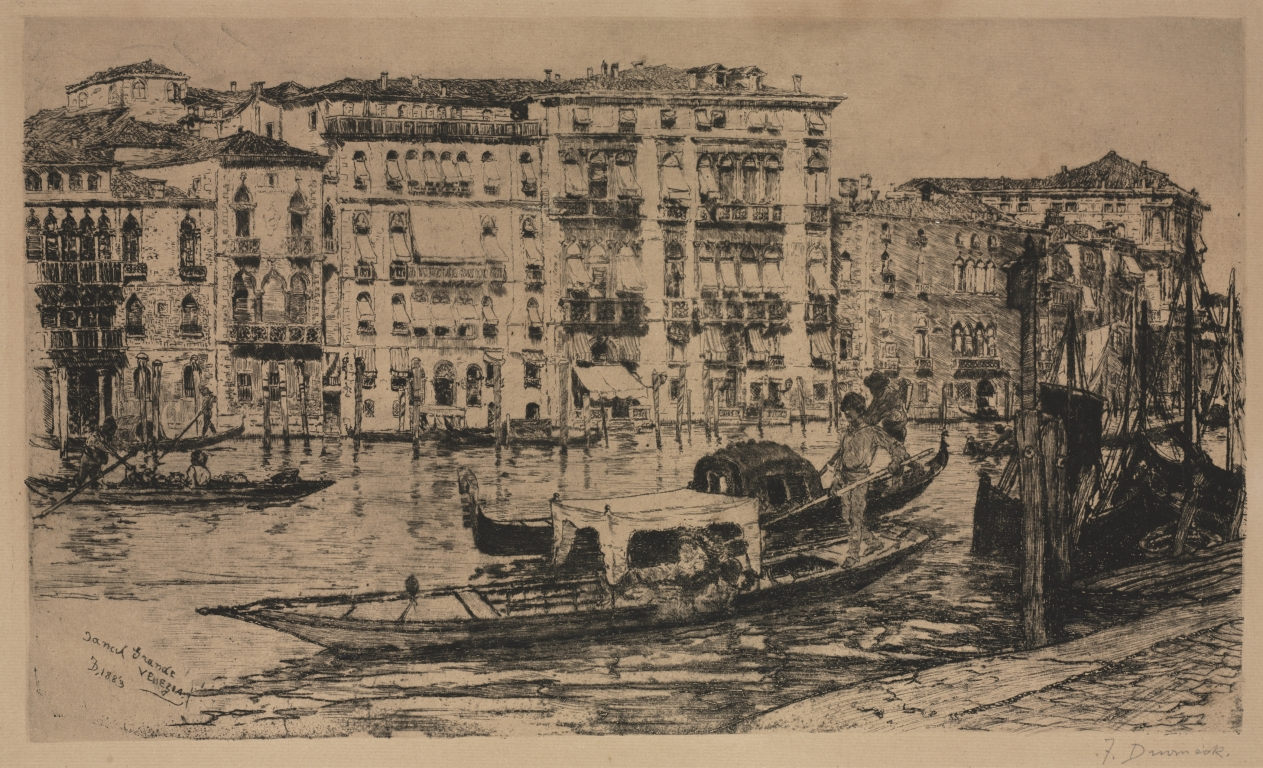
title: Grand Canal, Venice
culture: America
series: Desdemona's House, Grand Canal, Venice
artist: Frank Duveneck (American, 1848–1919)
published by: Frederick Keppel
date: 1889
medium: etching with pencil additions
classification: Print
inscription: Lower margin, in pencil: "F. Duveneck"